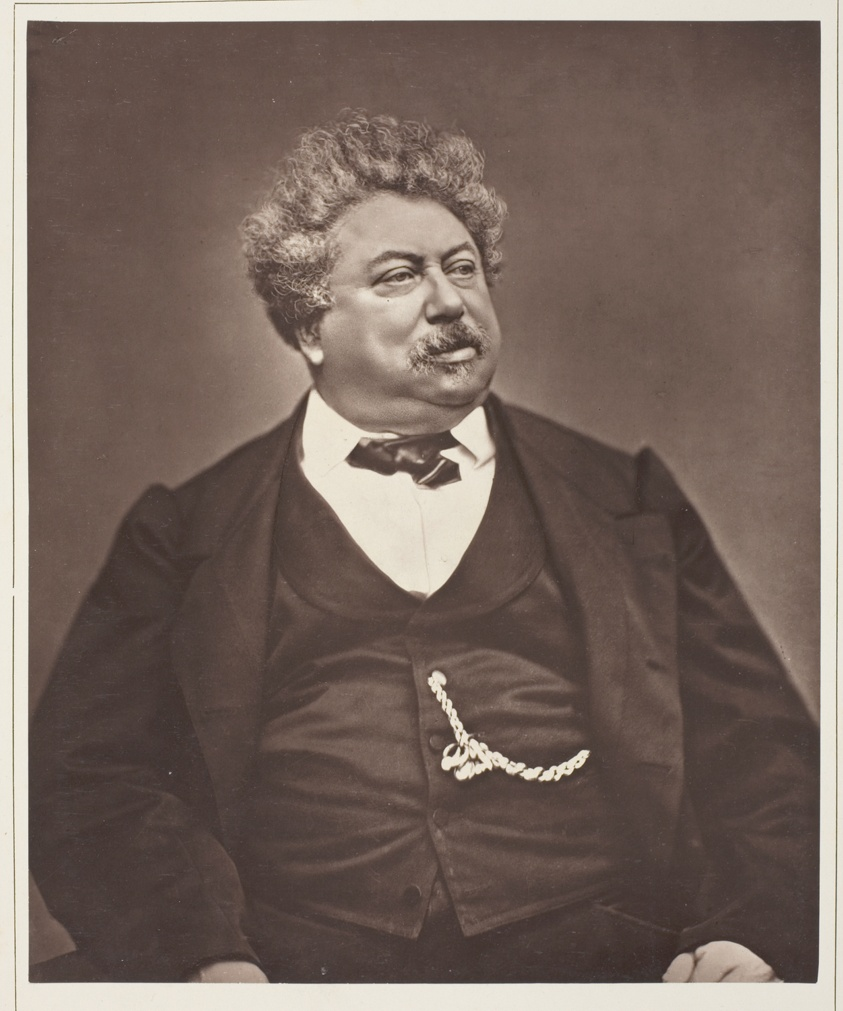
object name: Photograph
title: Alexandre Dumas (French novelist and playwright, 1802-1870)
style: 19th century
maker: Étienne Carjat; French, 1828–1906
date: c. 1876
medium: Woodburytype, from the periodical “Galerie Contemporaine Littéraire, Artistique” (1878), volume 5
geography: France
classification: woodburytype; photomechanical process; photography; photograph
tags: Collected by Hugh Edwards, Contemporaine Littéraire